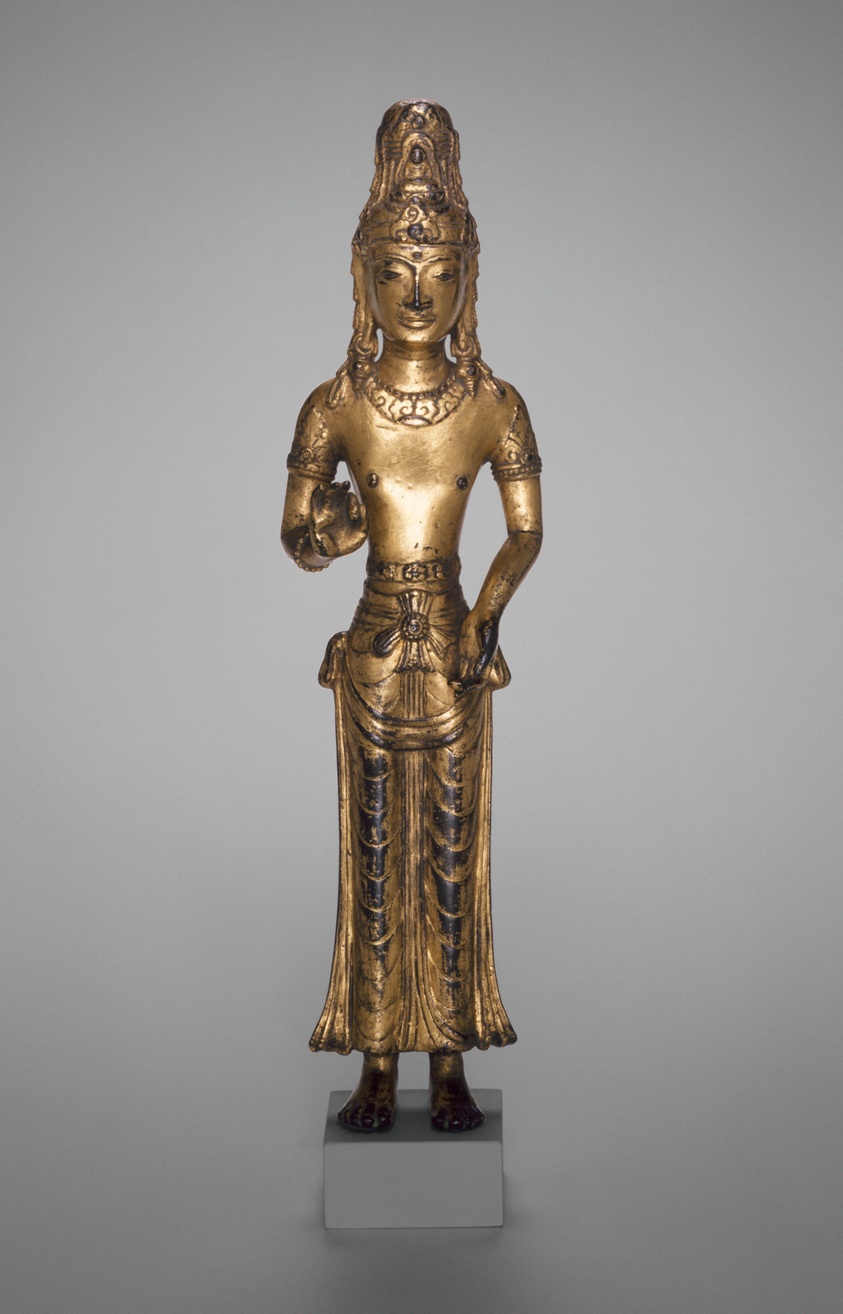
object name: Sculpture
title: Guanyin (Avalokiteshvara)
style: Chinese (culture or style)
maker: China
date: Dali kingdom (c. 937–1253), 12th century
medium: Gilt copper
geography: China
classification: bronze; metal; sculpture; asian art